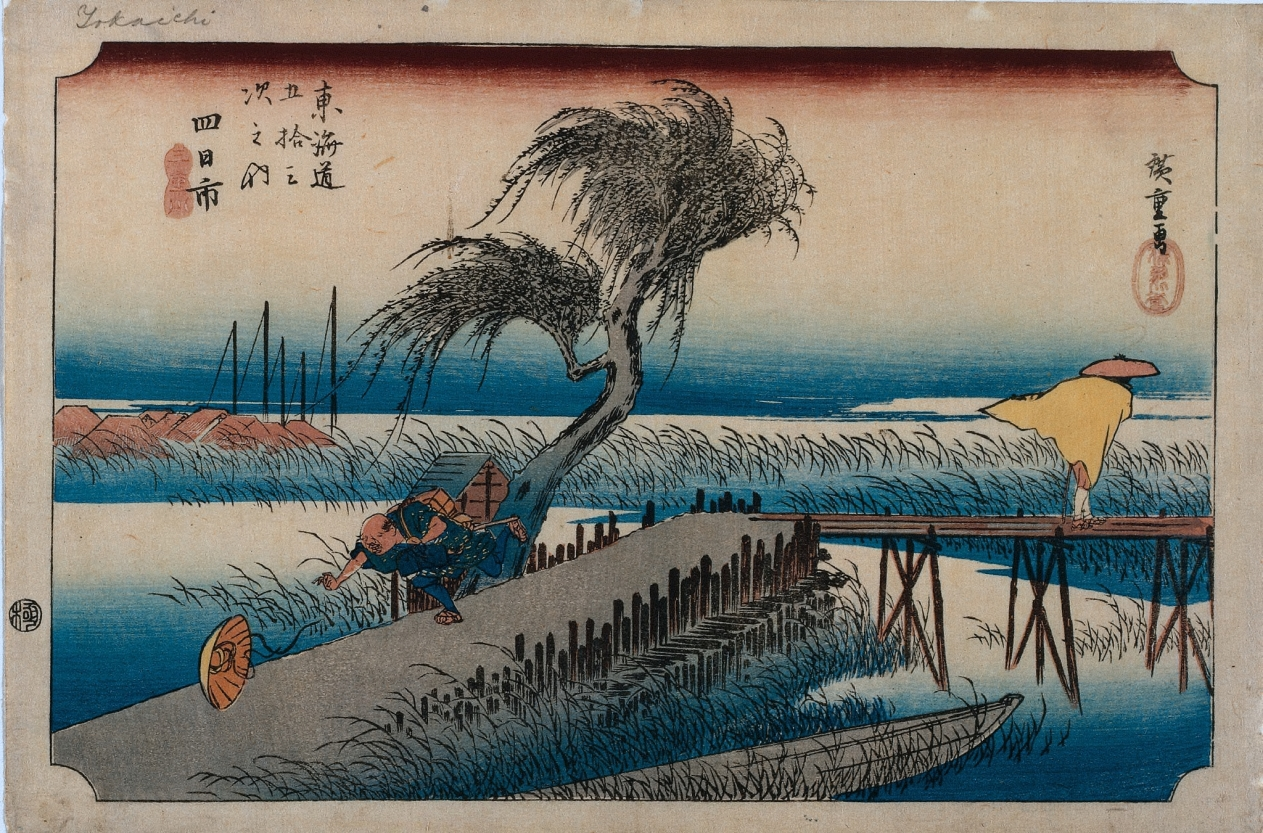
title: Yokkaichi: View of the Mie River, from the series The Fifty-Three Stations of the Tōkaidō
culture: Japan, Edo period (1615–1868)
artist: Utagawa Hiroshige (Japanese, 1797–1858)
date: c. 1833–34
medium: Color woodblock print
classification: Print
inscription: Signature: Hiroshige ga Publisher: Takenouchi Magohachi (Hoeido) Seal: kiwame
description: This print is from the first Tōkaidō series by Hiroshige. Yokkaichi was historically known for a major market held there on the fourth day of every month. However, instead of the market, Hiroshige has chosen to present a windy scene in the marshes along the Mie River just outside the town. No written records survive to indicate why Hiroshige chose the marshes over the market, but the result is a dynamic display of the power of wind.